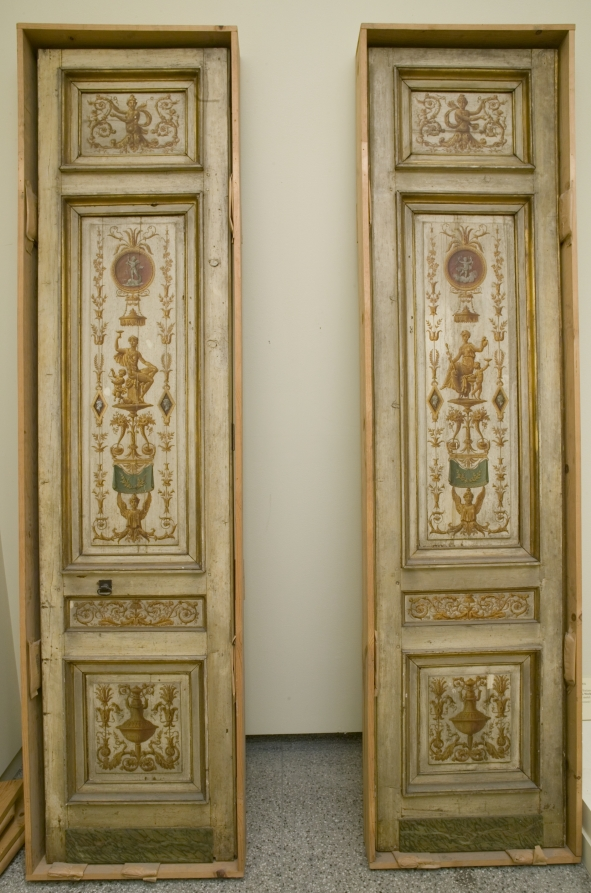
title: Double-leaf Doors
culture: France, 18th century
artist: Pierre Rousseau (French, 1751–1829)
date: 1790s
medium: oil on wood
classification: Painting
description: Shifts in style and taste often result in changes to original architectural details. Rousseau painted these doors with imitation dark wood grain. Another craftsman later scraped off the dark color surrounding the classical designs. This set was conserved in 1979 and retains more traces of the original graining than the other doors by this artist in the museum's collection.